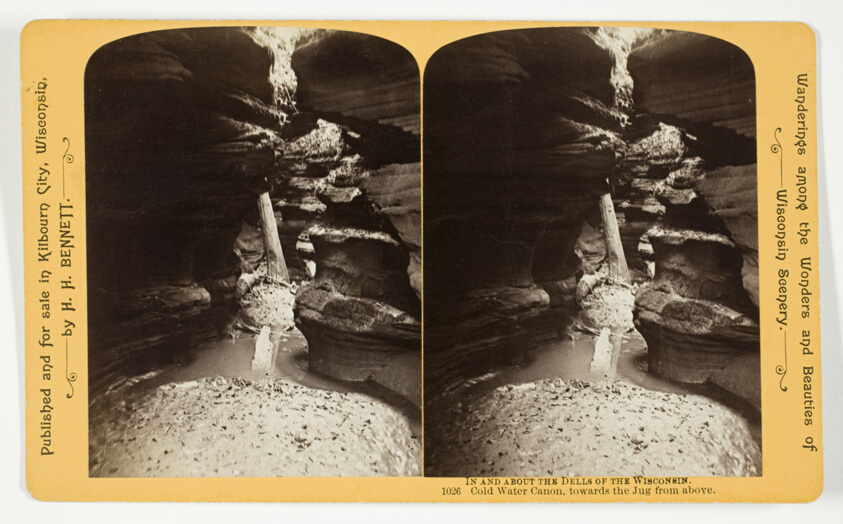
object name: Photograph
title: Cold Water Canon, towards the Jug from above, No. 1026 from the series "In and About the Dells of the Wisconsin River"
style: 19th century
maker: Henry Hamilton Bennett (American, born Canada, 1843-1908)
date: 1870/1908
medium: Albumen print, stereo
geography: Wisconsin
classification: photography; photograph; albumen silver print; stereograph (albumen)